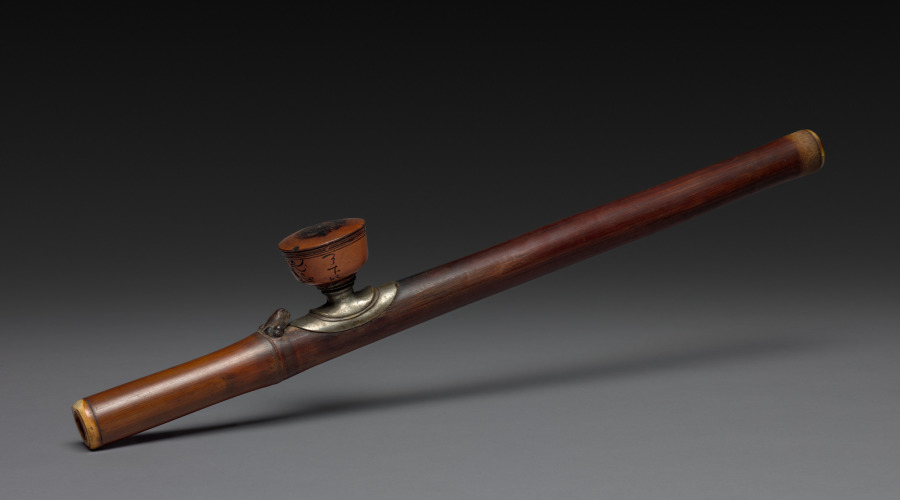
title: Opium Pipe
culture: China, Qing dynasty (1644-1911) or Republican period (1912-49)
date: early 1900s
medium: bamboo with ivory tip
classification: Miscellaneous